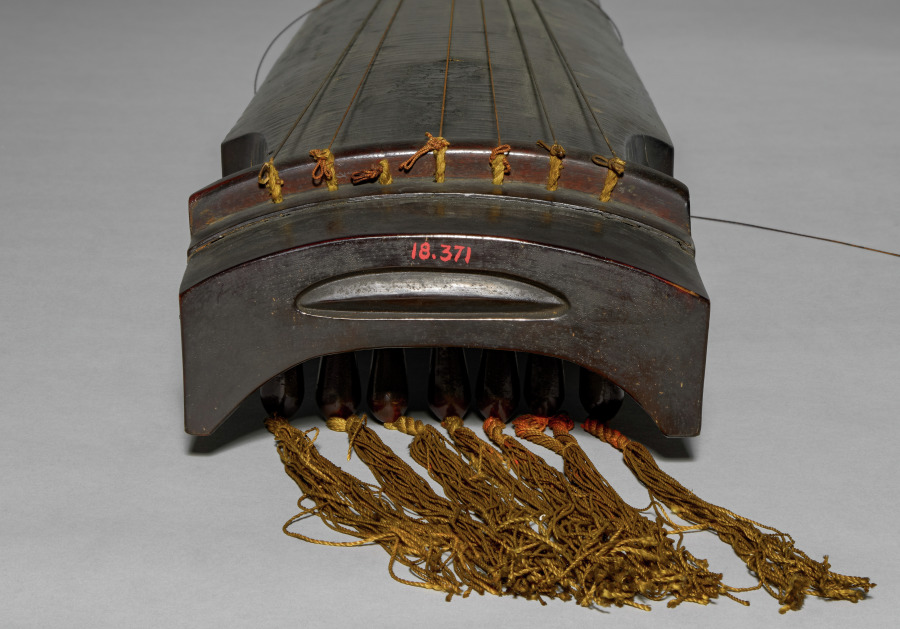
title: Guqin made by Zhang Ruixiu of Suzhou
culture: China, Ming dynasty (1368–1644)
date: 1584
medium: Seven-string Asian long zither, chordophone, made from wood, lacquer, mother of pearl, and silk strings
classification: Musical Instrument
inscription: 為海虞天池先生重斲/ 萬曆甲申古吳張睿脩得古桐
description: China’s most prestigious instrument, the guqin can be traced to the Chu culture almost 2500 years ago. By the late Ming dynasty, Jiangnan was a center of high-end guqin production. Coated in black lacquer, this elegantly crafted instrument is inscribed on the inside, stating it was made by Zhang Ruixiu of Suzhou for Mr. Tianchi of Haiyu, also known as Yan Cheng (1547–1625). Yan was a key figure in guqin music history and founder of the Yushan school in Suzhou. Zhang Ruixiu was a guqin maker, known for achieving a supreme tone quality. Ten instruments attributed to him are known, of which this guqin has the earliest date.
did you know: The 13 studs in mother-of-pearl inlay indicate finger positions for sounding harmonics.